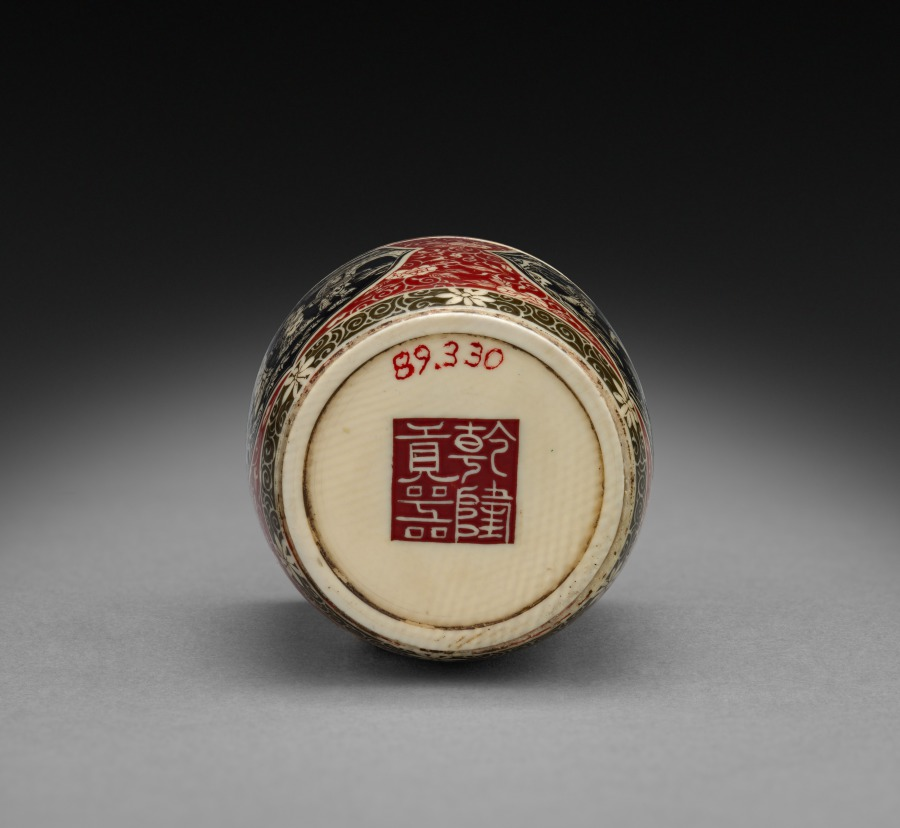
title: Miniature Garden Seat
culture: China, Qing dynasty (1644-1911), Qianlong mark and reign (1736-95)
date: late 1700s–early 1800s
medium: ivory with pigments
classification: Ivory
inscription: 乾隆貢器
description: In the Qing dynasty (1644–1911), luxury items became more affordable to larger parts of the society, including women, merchants, and literati in non-official positions. Imperial patronage and a growing urban population encouraged consumption of luxury goods and local craftmanship. This ivory carved and painted to resemble a miniature garden seat illustrates the superb skills and the creative mind of the talented artisans who sought clients on a competitive market.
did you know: A servant carrying a qin, zither, accompanies two gentlemen admiring the trees.